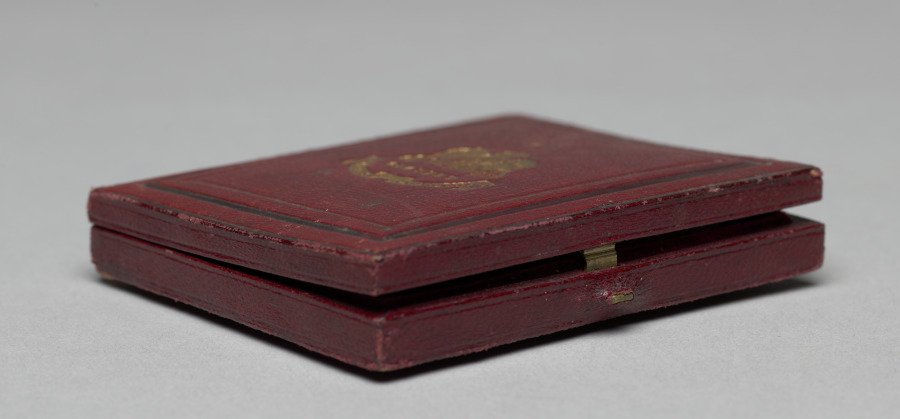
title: High-born lady in white bonnet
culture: France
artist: Antoine Claudet (French, 1797–1867)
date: c. 1855–58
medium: daguerreotype, tinted, sixth plate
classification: Photograph